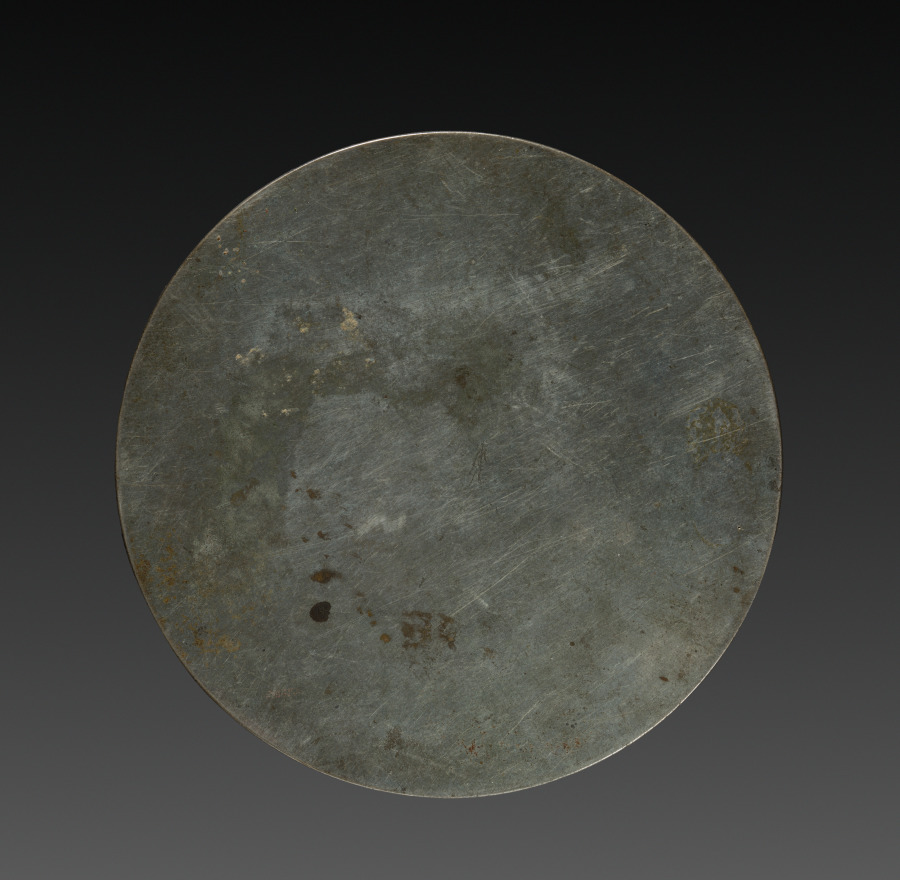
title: Mirror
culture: Japan, Muromachi period (1392–1573)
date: 1392–1573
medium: bronze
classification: Metalwork